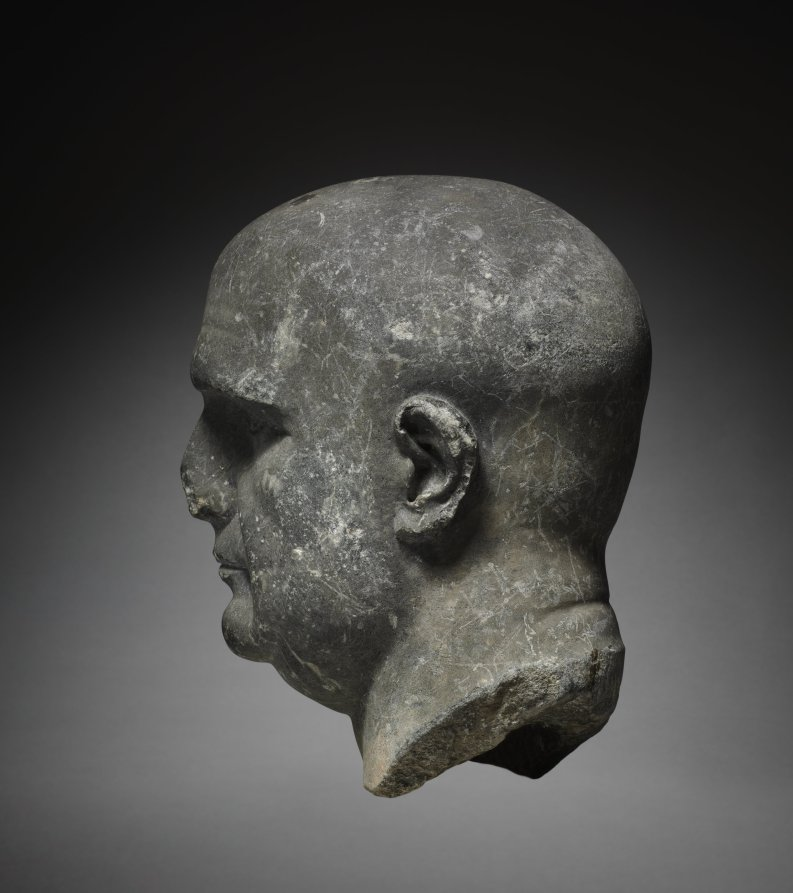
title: Portrait Head of a Priest of Isis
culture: Italy, Roman style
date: 100–200 CE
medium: limestone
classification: Forgery